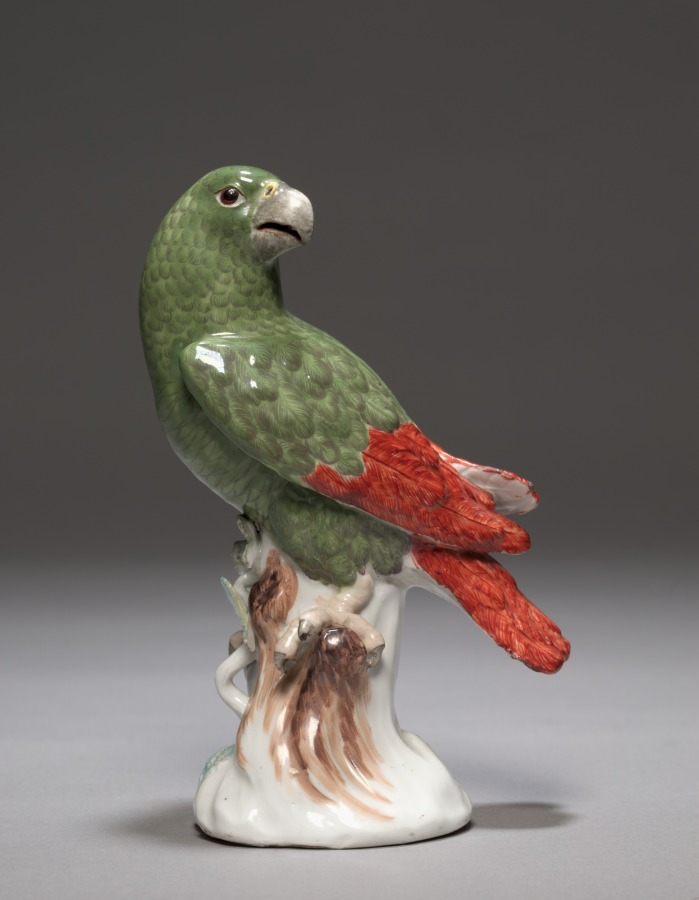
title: Candelabrum with Parrot (Parrot)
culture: Germany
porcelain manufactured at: Meissen Porcelain Factory (German, est. c. 1710)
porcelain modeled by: Johann Joachim Kändler (German, 1706–1768)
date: c. 1740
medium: porcelain mounted in gilt bronze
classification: Ceramic